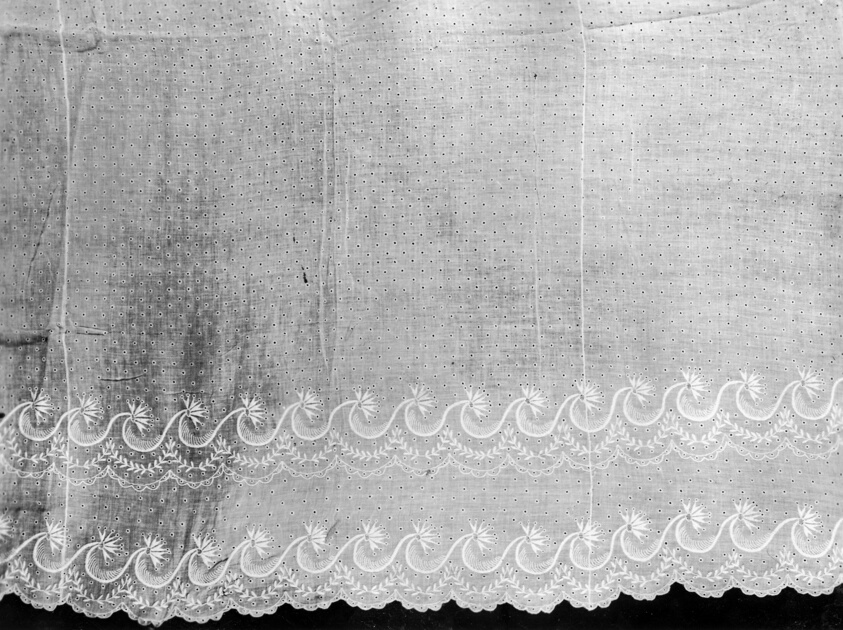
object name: Textile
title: Skirt of a Dress Pattern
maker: France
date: c. 1810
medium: Muslin, plain weave; embroidered with cotton thread in satin and eyelet stitches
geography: France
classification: textile; needlework (visual works); costume